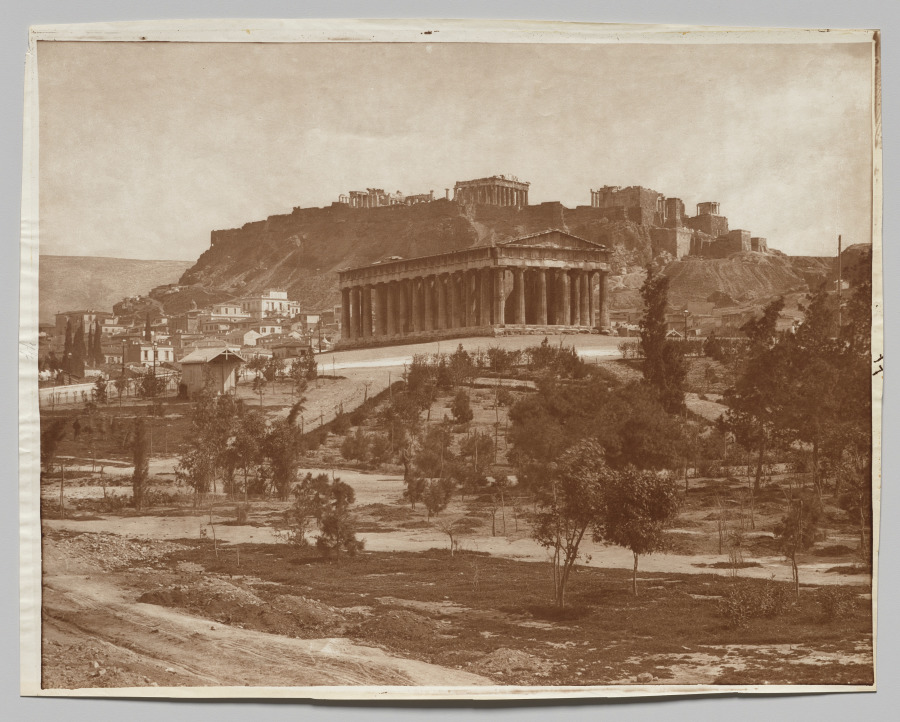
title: View of the Acropolis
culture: France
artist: Adolphe Braun & Co. (French, 1845–1894)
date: c. 1880s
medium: mammoth carbon print, brown-toned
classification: Photograph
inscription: Pencil marking on recto left margin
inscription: Numbers imprinted on recto, right margin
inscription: Written in pencil on verso: "77"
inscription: Written in pencil on verso: "Acropole"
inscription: Written in pencil on verso: "D"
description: Adolphe marketed his photos of flowers, artworks, landscapes, and monuments from across Europe throughout that continent and in North America. The Acropolis of Athens, the most famous ancient Greek site, must have sold well; Braun offered multiple views of it. The image on a carbon print is formed from pigmented gelatin, which is far more resistant to fading than the silver or metal salts in silver-based prints.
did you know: Carbon prints are among the stable and long-lasting photographic processes.